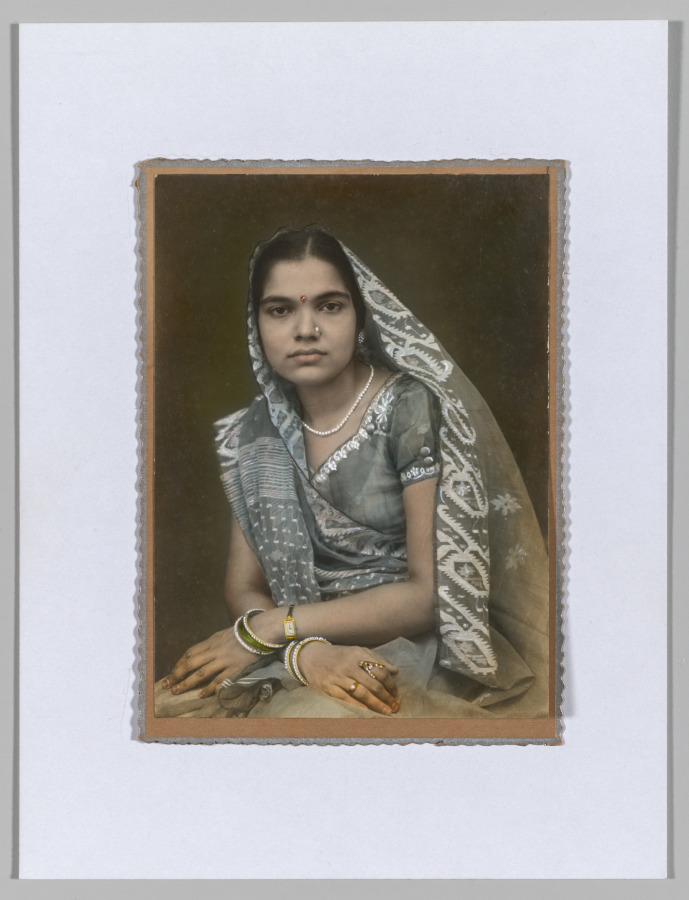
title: Untitled (Portrait of a Woman in Gray Sari and Veil)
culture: India, 20th century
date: 1900s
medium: Gelatin silver print, hand colored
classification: Photograph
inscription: Written in black ink on white adhesive label on verso: “Unknown Studio, India/Vintage hand colored/argentic print/140 pounds {crossed out in pencil]60 euros”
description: This hand-tinted portrait photograph is a modern example of a tradition in Indian painting that extends back to the mid-1800s. Having a photograph hand painted required an extra charge, but made the portraits more lifelike and endowed them with the status of a luxury item, akin to painted portraiture.